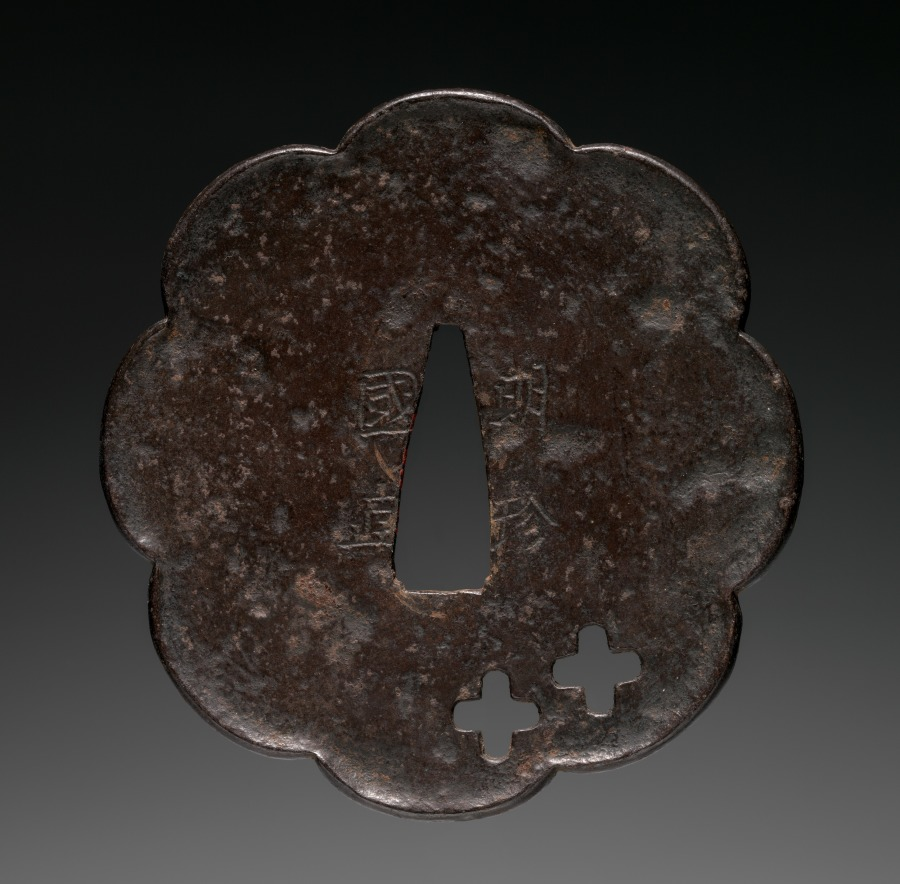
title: Sword Guard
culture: Japan, Edo period (1615–1868)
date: mid-1700s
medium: iron (Myochin type)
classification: Arms and Armor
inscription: signed "Myochin Kuninao."